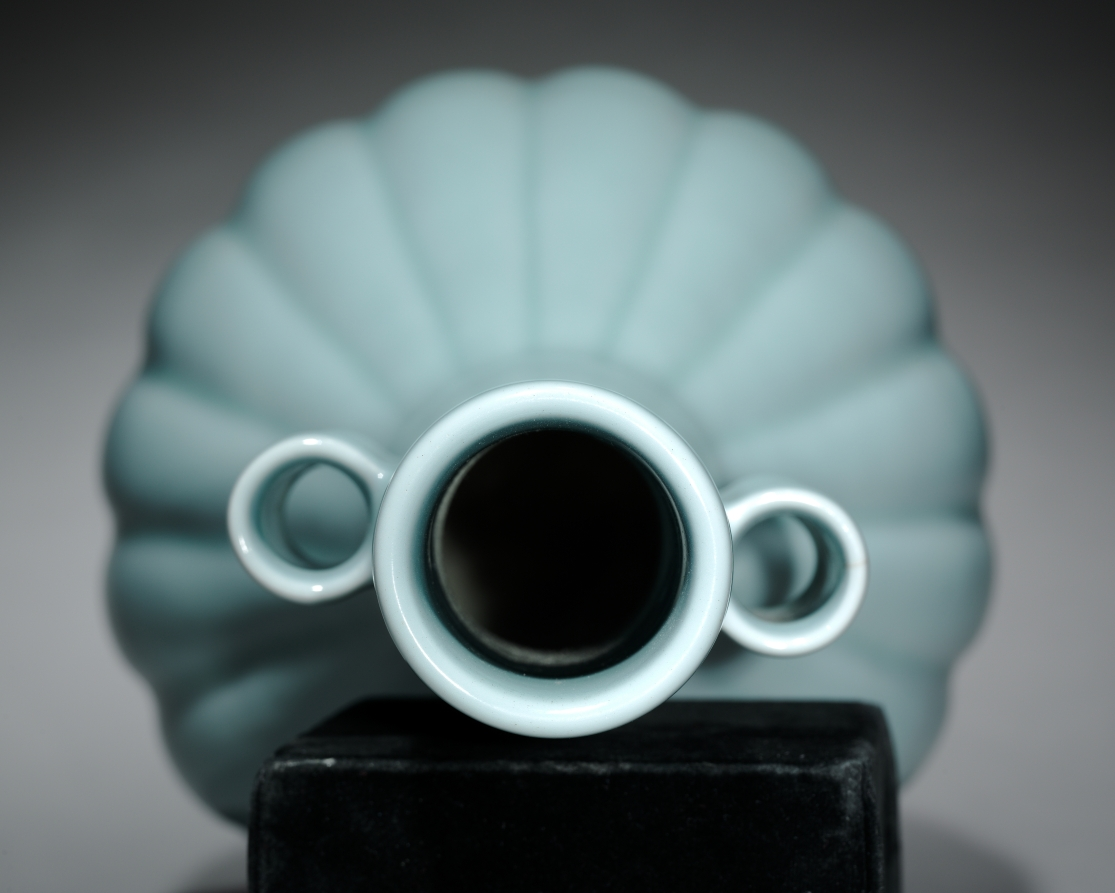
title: Melon-Shaped Fluted Vase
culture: China, Jiangxi province, Jingdezhen kilns, Qing dynasty (1644-1911), Qianlong mark and reign (1736-95)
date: 1736–95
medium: porcelain with clair-de-lune glaze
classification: Ceramic